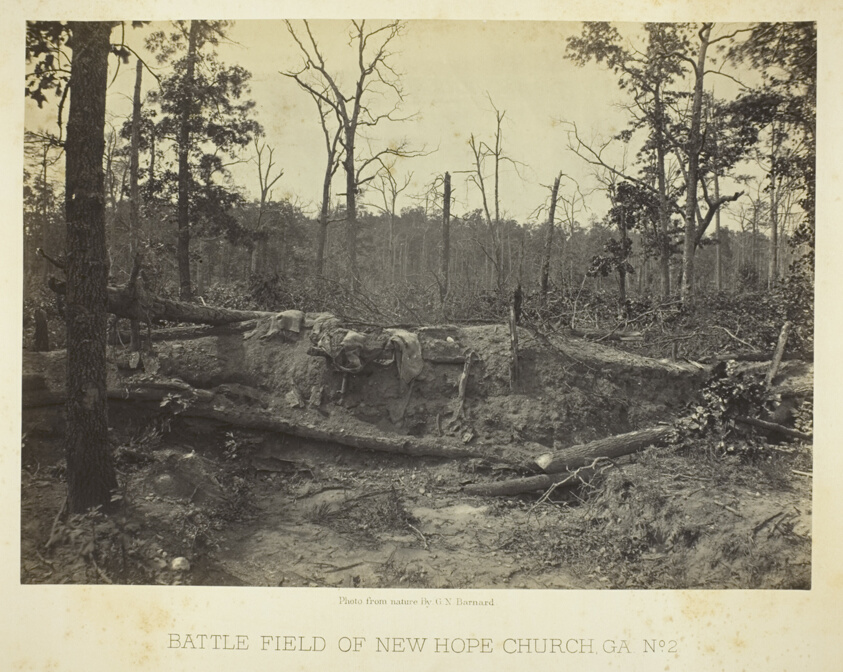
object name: Photograph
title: Battle Field of New Hope Church, GA, No. 2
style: 19th century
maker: George N. Barnard (American, 1819–1902)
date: 1866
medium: Albumen print, plate 26 from the album "Photographic Views of the Sherman Campaign" (1866)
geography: United States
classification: albumen silver print; photographic process; photography; photograph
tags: Collected by Hugh Edwards, Sherman's Campaign 1866